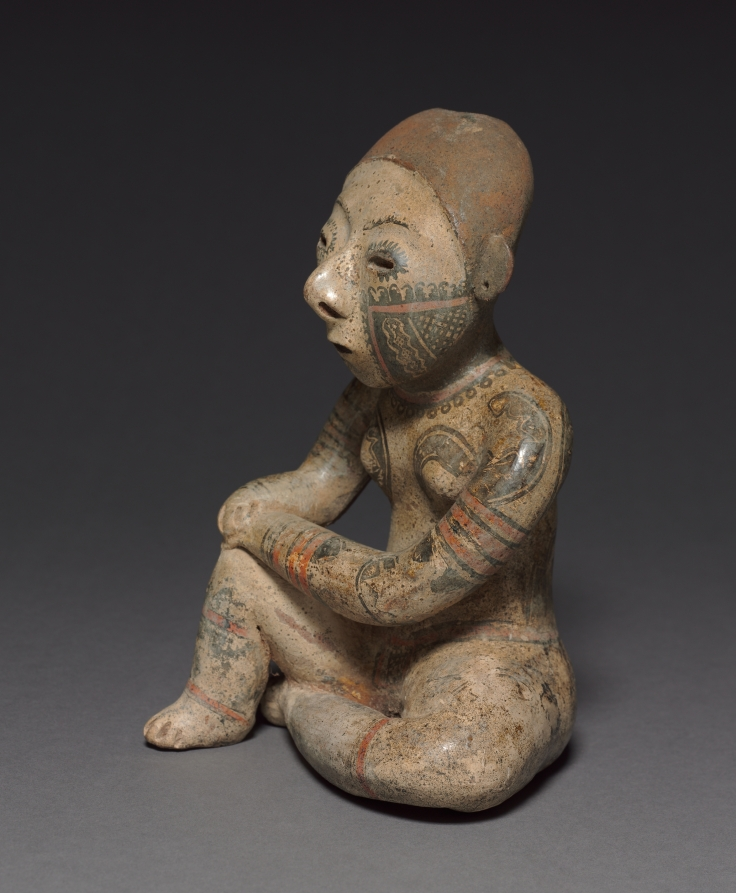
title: Seated Female Figure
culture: Mexico, Nayarit, Chinesco Style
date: c. 100 BCE–300 CE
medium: earthenware with burnished, colored slips and resist patterning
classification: Sculpture